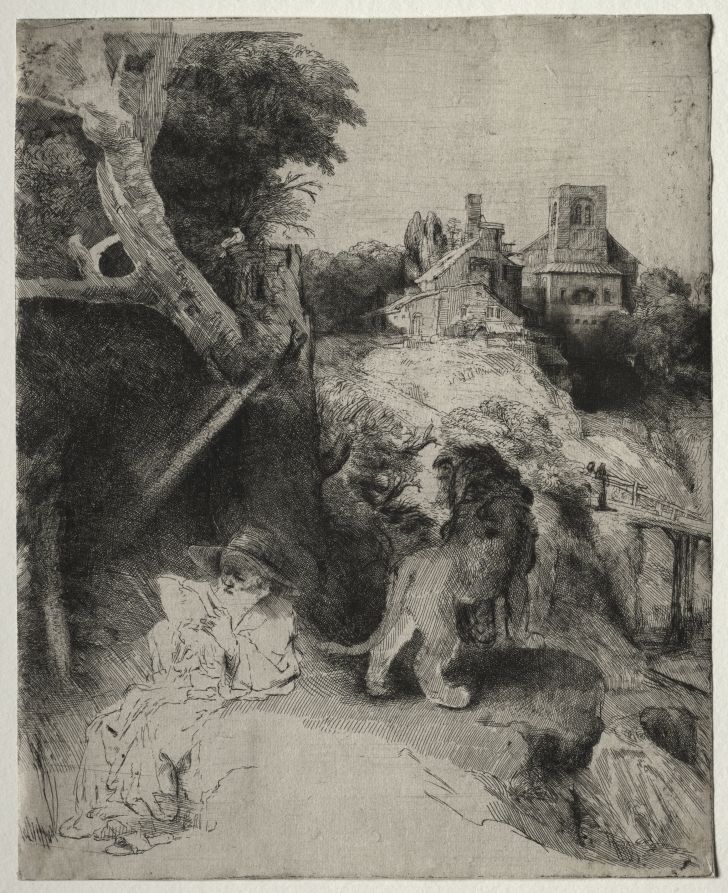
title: St. Jerome Reading in an Italian Landscape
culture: Netherlands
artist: Rembrandt van Rijn (Dutch, 1606–1669)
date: c. 1653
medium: etching, engraving, and drypoint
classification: Print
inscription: VERSO, upper left, pen and brown ink: [illegible ; center, in graphite: 1525[sideways] ; lower left, in pen and brown ink: DD / 22 ; lower left, in graphite: a62686 ; lower right, in graphite: FWXV